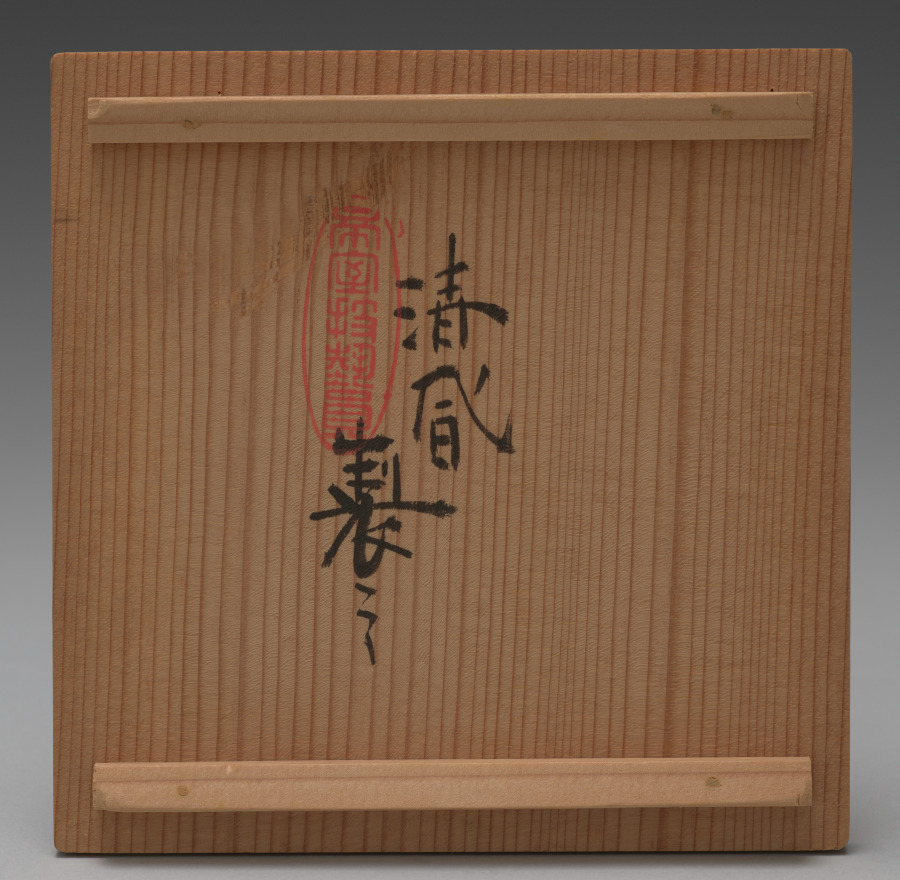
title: Teapot with Chrysanthemums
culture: Japan, Meiji period (1868–1912)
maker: Seifū Yohei III (Japanese, 1851–1914)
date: 1912–14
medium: Porcelian with overglaze enamel and gold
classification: Ceramic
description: This teapot with recessed lid has a bold, realistic design of pale yellow and white chrysanthemums rendered in overglaze color enamels and dotted gold centers. Black contour lines define the yellow and white flowers and their green stems and leaves. Small pink and purple chrysanthemums are rendered as simple motifs, their shapes defined in contrast to the white ground of the pot.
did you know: This side-handled teapot is designed for brewing and serving sencha.